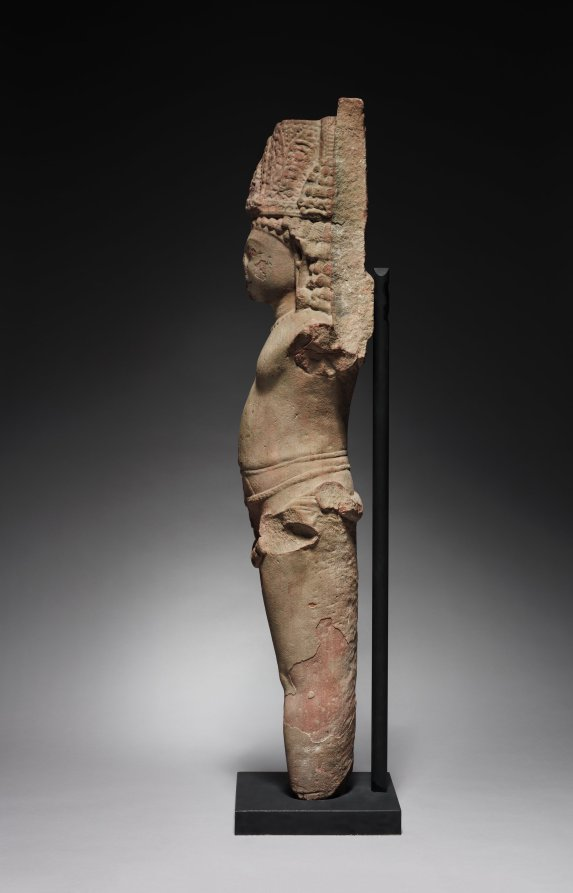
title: Standing Vishnu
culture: Northern India, Mathura, late Gupta Period (320-647)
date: late 500s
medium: red sandstone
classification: Sculpture